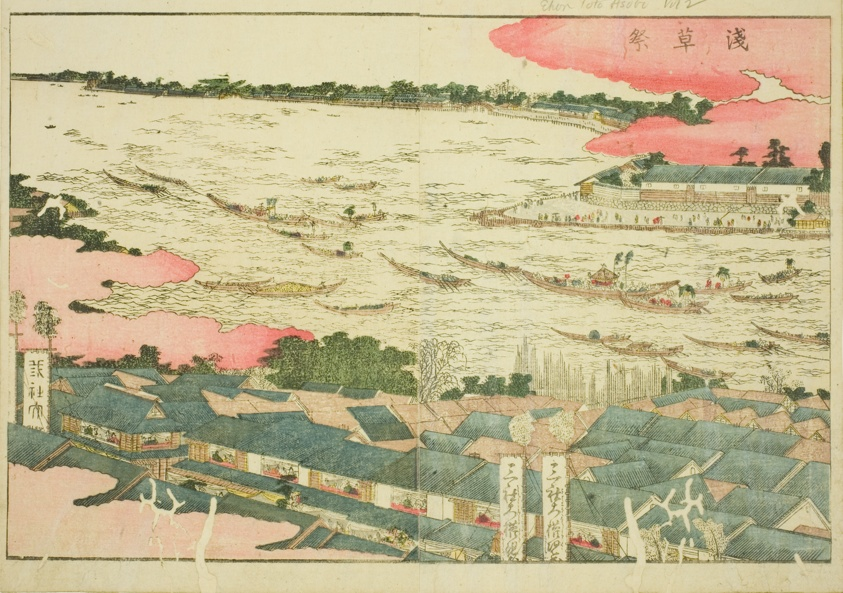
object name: Print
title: Asakusa Festival (Asakusa matsuri), from the illustrated book "Picture Book of Amusements of the East (Ehon Azuma asobi)"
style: Japanese (culture or style)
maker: Katsushika Hokusai 葛飾 北斎; Japanese, 1760-1849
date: c. 1802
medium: Color woodblock print; double-page illustration from book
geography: Japan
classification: woodblock print; print; asian art